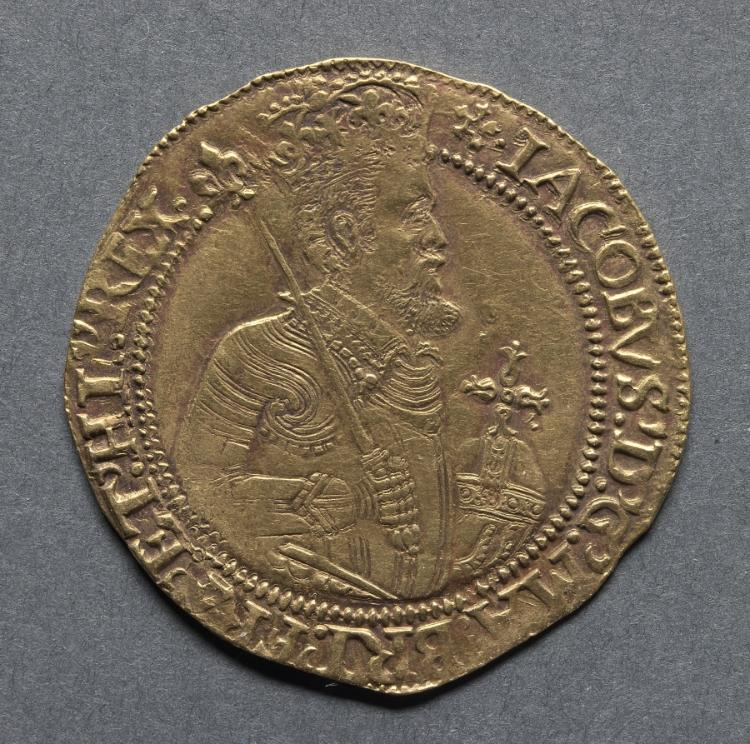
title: Unite: James I (obverse)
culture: England, James I, 1603-1625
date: 1613–1615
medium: gold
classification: Coins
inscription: IACOBVS D G ANG SCO FRAN ET HIB REX